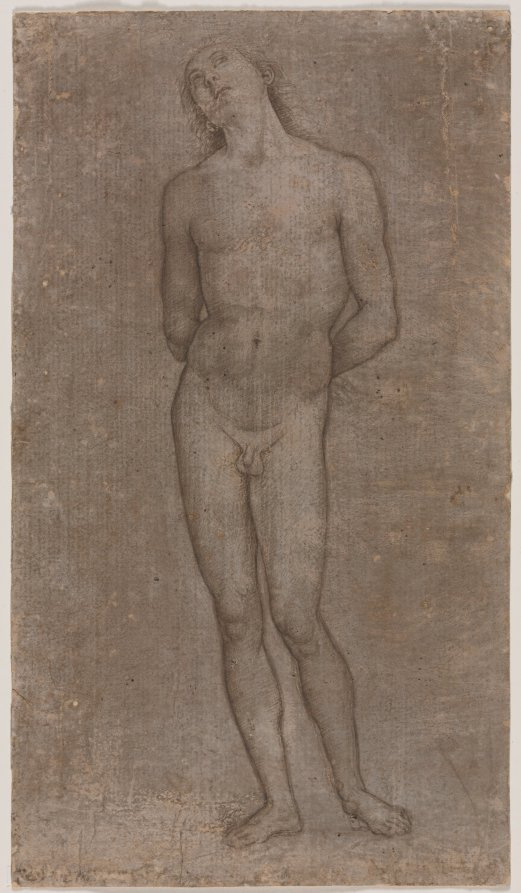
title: Saint Sebastian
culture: Italy, 15th century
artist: Perugino (Italian, c. 1450/55–1523)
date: c. 1493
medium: metalpoint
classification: Drawing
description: The Florentine painter Perugino made drawings to record figural types and poses that could be repeated throughout his finished paintings. He used the elegant, graceful figure seen here, with its soft athletic body and upwardly turned gaze, in at least two paintings of the 3rd-century martyr Saint Sebastian (the related paintings are now in the collection of the Galleria degli Uffizi, and the Louvre). Sebastian was shot with arrows after being exposed as a Christian convert; he was particularly revered during the Renaissance as a protector against illness such as the plague. Portrayal of the saint required Perugino to express his knowledge of human anatomy, while evoking the gentle s-curve associated with classical sculpture. Drawn with metalpoint, a typical drawing medium in the 1400s, the reinforced lines along the contour of the figure indicate that it was probably used by the artist or by one of his many studio assistants to transfer the design to another sheet.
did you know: The elegant pose of Saint Sebastian here was used by the artist in at least two finished paintings of the saint.